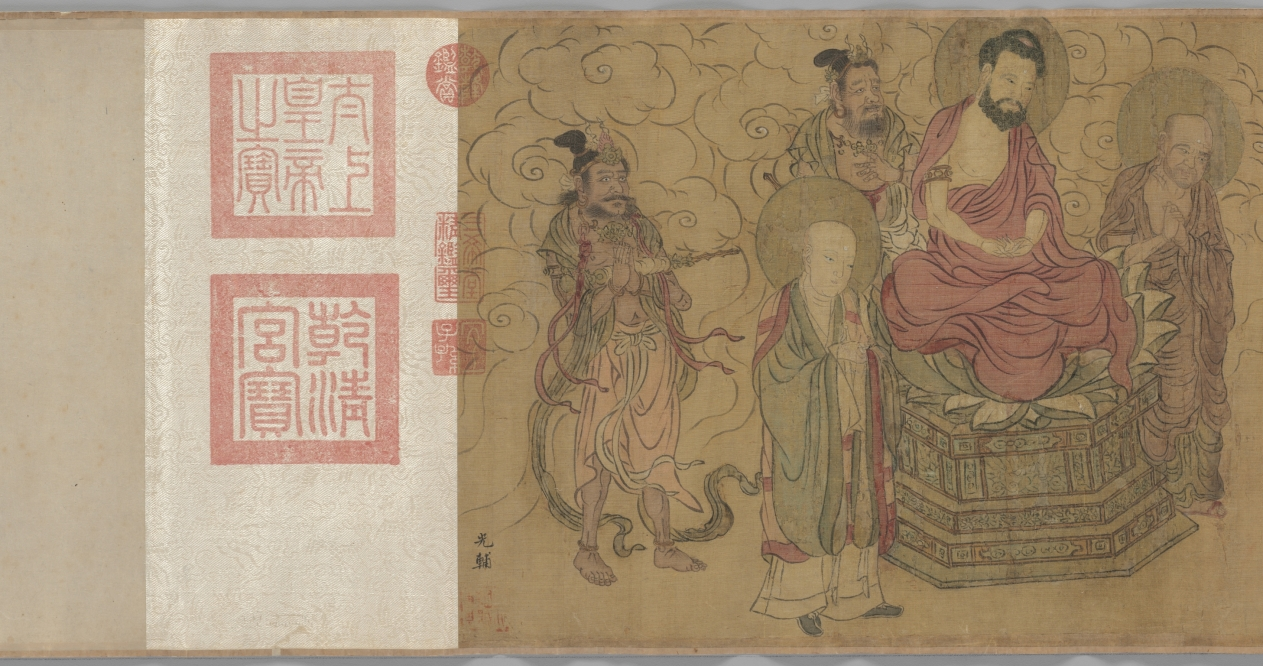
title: Barbarian Royalty Worshiping the Buddha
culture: China, Northern Song dynasty (960-1127)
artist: attributed to Zhao Guangfu (Chinese, c. 923–976)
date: 900s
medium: Handscroll; ink and color on silk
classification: Painting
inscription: 佛法入中國千餘年。殆是家有其像。見之者悉起敬心，不當以古今畫手分別也。 子昂 [印]趙氏子昂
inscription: Colophon by Guo Bi (1280–1335): A transcription of "Zheng fa yan zang ming bing xu" 正法眼藏銘幷序 by Wuwei Jushi 無為居士. Signature: Situi Jushi Guo Bi 思退居士郭畀. 2 seals.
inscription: Spurious artist's signature: Zhao Guangfu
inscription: 1 seal of the Li family (Yuan Dynasty)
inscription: 14 seals of Qianlong Emperor (r. 1736–95)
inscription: 1 seal of Jiaqing Emperor (r. 1796–1820)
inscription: 1 seal of Xuantong Emperor (r. 1909–11)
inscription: 1 official seal of the Yuan dynasty, “Tian li zhi bao 天曆之寶” (Treasure of Tianli).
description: This painting begins on the right with 15 people following a dignified figure wearing headgear with twin pheasant feathers. He extends an incense burner toward the Buddha, who is seated on his lotus throne and flanked by two haloed disciples and two Heavenly Kings. The worshipers’ diverse physical features, regional finery, and religious affiliations suggest the universal appeal of Buddhism. The imagery was inspired by the foreign envoys who frequently came to the Chinese court to give tribute to the emperor. At the time, all outsiders were considered “barbarians,” so their presence was seen as acknowledgment of China’s political and cultural power.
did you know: Sixteen "barbarians" pay homage to the Buddha, who is seated on a lotus throne with two disciples and two guardians.